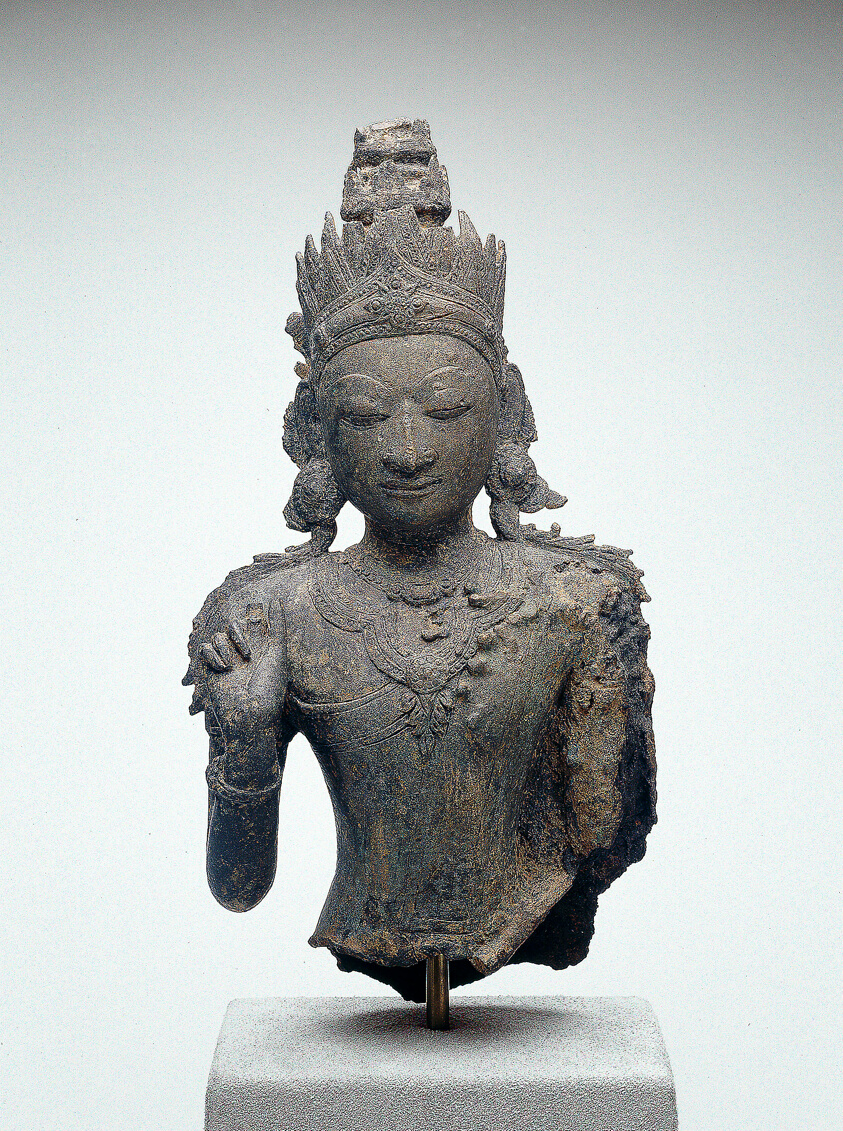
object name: Sculpture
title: Bust of Crowned and Adorned Buddha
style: Southeast Asian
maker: Burma (Myanmar)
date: 16th/18th century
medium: Bronze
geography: Myanmar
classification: bronze; metal; sculpture; asian art